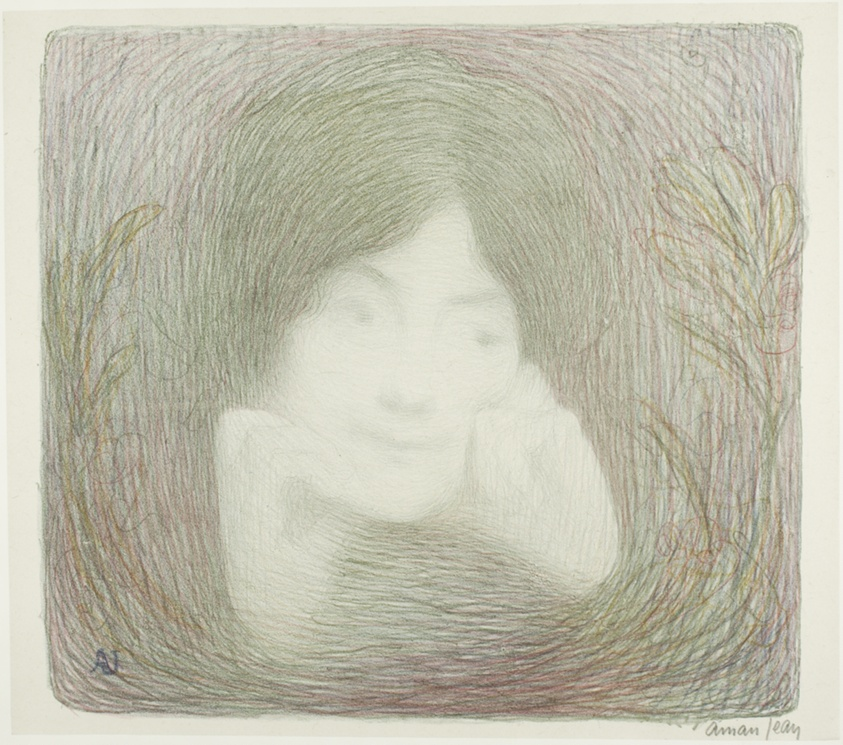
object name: Print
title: Reverie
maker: Edmond-François Aman-Jean; French, 1860-1935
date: c. 1900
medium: Color lithograph on ivory Japanese paper, laid down on white wove paper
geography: France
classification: lithograph; print; prints and drawing